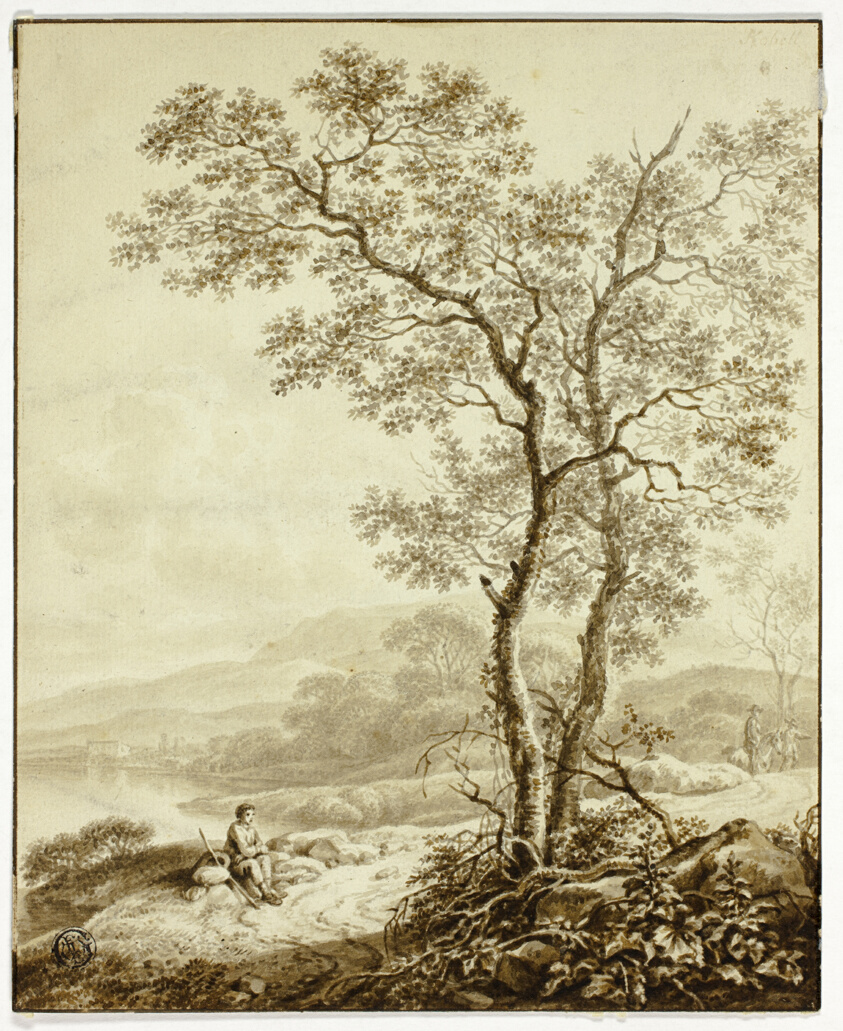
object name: Drawing and Watercolor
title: Winding Road Beside Lake, with Large Tree and Resting Traveler in Foreground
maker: William Marshall Craig (English, c. 1765-c. 1834)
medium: Brush and brown wash, over graphite, on ivory laid paper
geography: England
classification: ink or chalk wash; drawings (visual works); prints and drawing